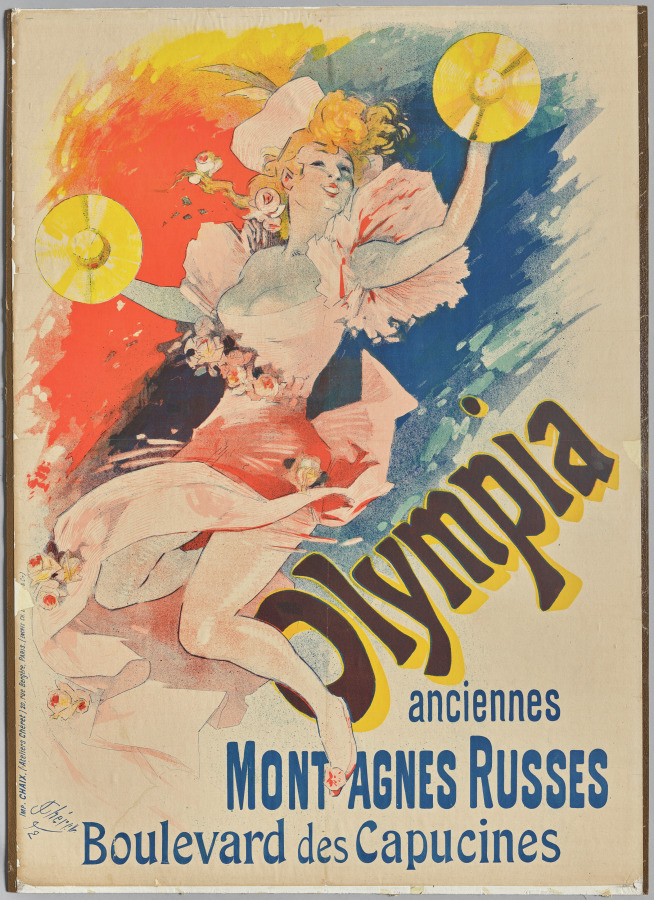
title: Olympia Montagne Russes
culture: France, 19th century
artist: Jules Chéret (French, 1836–1932)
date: 1892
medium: color lithograph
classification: Print